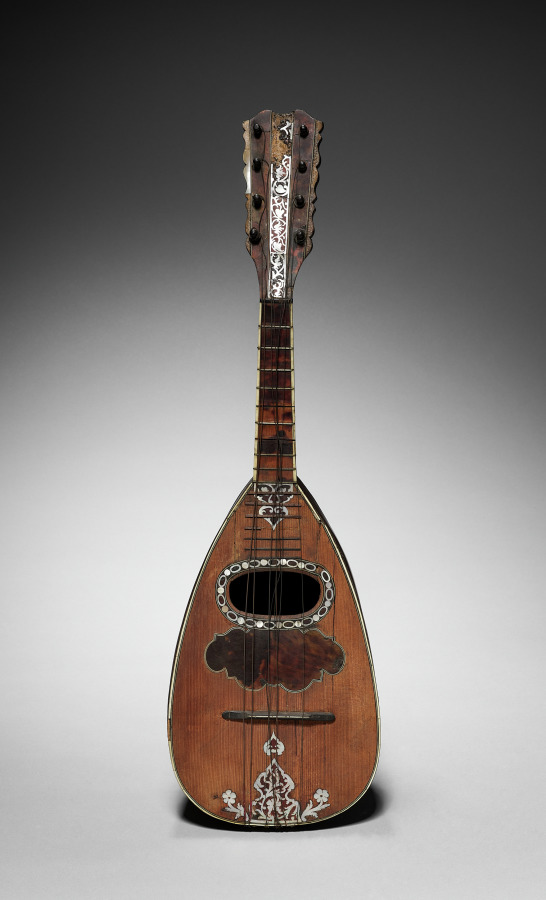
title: Mandoline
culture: Italy, Naples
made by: Giovanni Battista (Italian)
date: 1785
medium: wood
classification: Musical Instrument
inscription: bears a label which reads: "Gio: Battista Fabricatore fecit An 1785 in S. M. dell' Ajuto Napoli."